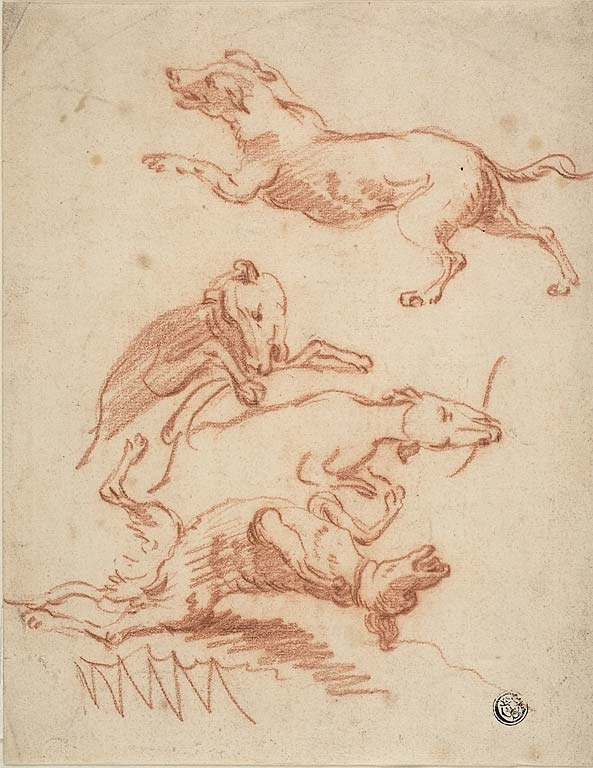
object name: Drawing and Watercolor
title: Sketches of Romping Dogs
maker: Probably Abraham Hondius (Dutch, c. 1625-1695); or possibly Johann Elias Ridinger (German, 1698-1767); or possibly Jan Fyt (Flemish, 1611-1661)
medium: Red chalk on ivory laid paper, laid down on ivory wove paper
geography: Germany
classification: chalk; drawings (visual works); prints and drawing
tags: dogs, animals